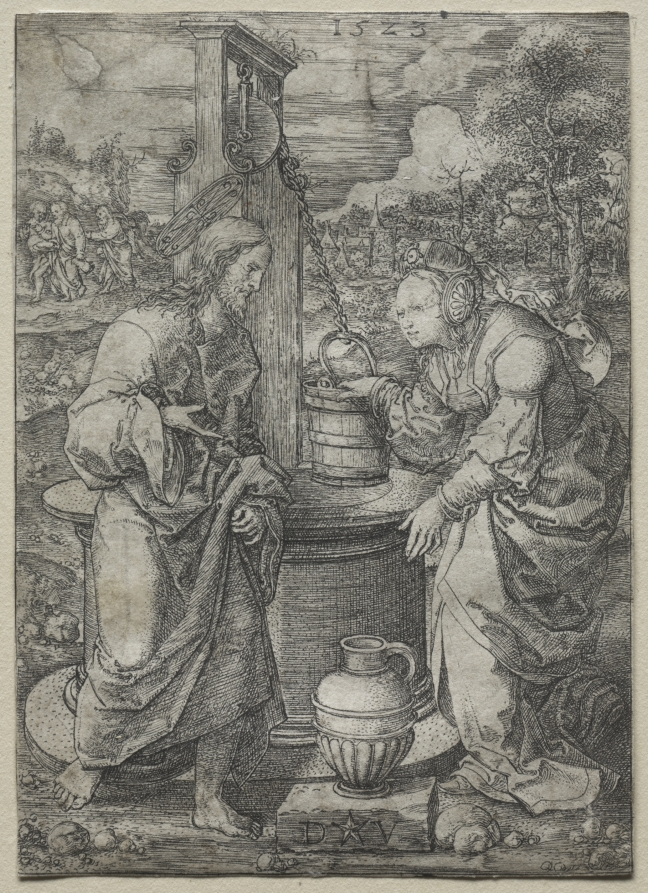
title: Christ and the Woman of Samaria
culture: Netherlands, South Lowlands, 16th century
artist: Dirk Vellert (Netherlandish, 1480/85–1547)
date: 1523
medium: engraving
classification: Print